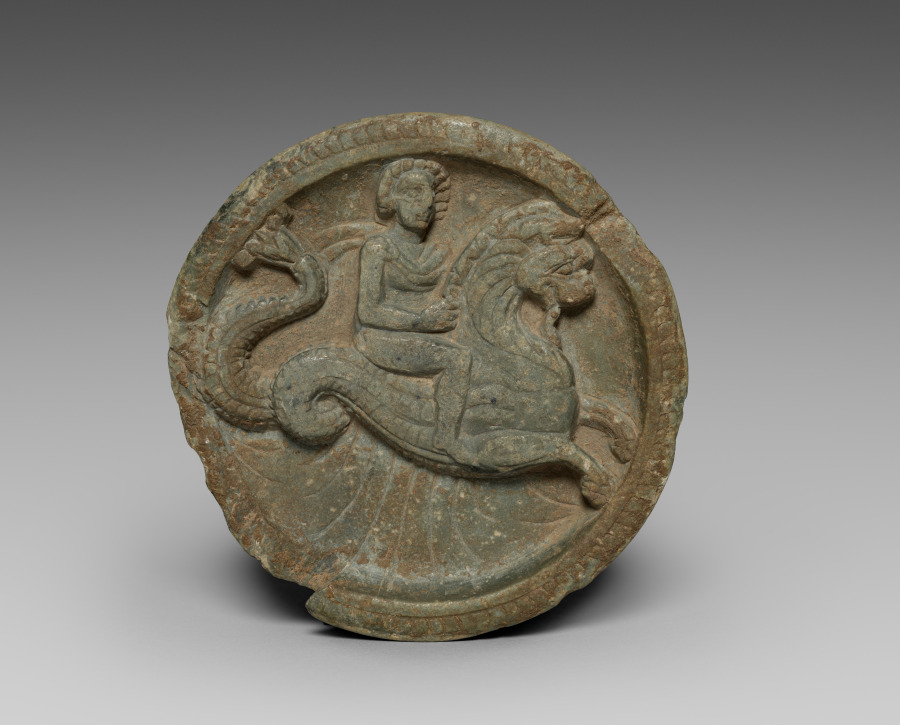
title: Patera with Man Riding Monster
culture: India, Gandhara, Taxila, Palera period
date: 1–200 CE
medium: gray schist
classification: Sculpture